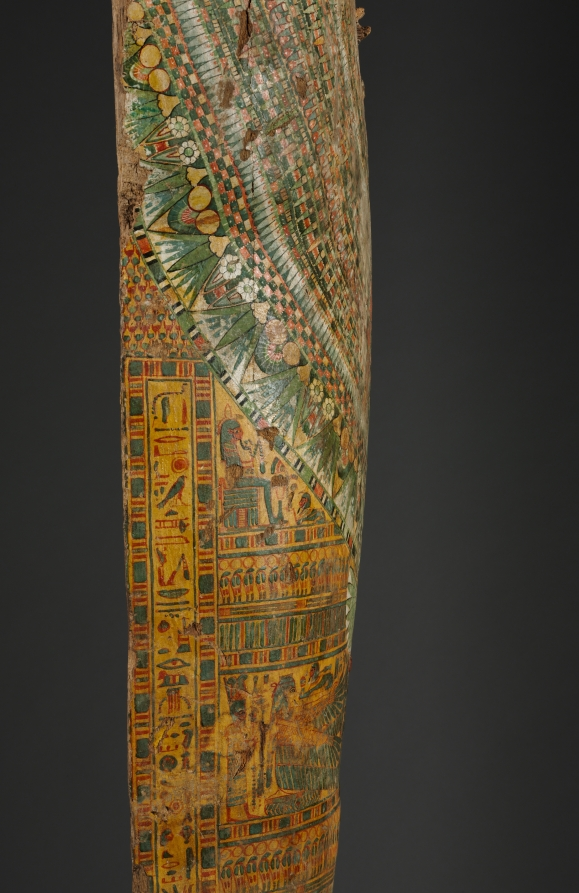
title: Coffin of Bakenmut (lid)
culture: Egypt, Thebes, Third Intermediate (1069–715 BCE), Dynasties 21–22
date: c. 1000–900 BCE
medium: gessoed and painted sycamore fig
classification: Funerary Equipment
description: The coffin of Bakenmut is one of the finest examples of painted wooden coffins made for the priests of Amen and their families at Thebes during Dynasty 21 and early Dynasty 22. The pharaohs of this time were no longer buried in the Valley of the Kings, but instead built tombs in the Delta, far to the north, where they resided. Security was lax in the Theban necropolis. The coffins and funerary goods of the wealthy citizens of Thebes were placed in unmarked and undecorated family tombs cut into the cliffs on the west bank of the Nile. All the care and detail that in more prosperous times were devoted to the decoration of the tomb chapel were now lavished on the elaborately painted coffins. Every available surface is crowded with religious scenes, images of funerary gods and goddesses, protective spells, and magical symbols. The deceased appears mummiform. An elaborate floral collar entirely covers the upper body, exposing only the separately attached hands (now lost). A pair of red "mummy braces" are crossed over the chest, their point of intersection marked by a winged sun disk. The lower body is covered with tiny figures modeled in gesso against a yellow background, which gives the effect of gold inlaid with glass or semiprecious stone. The decoration on the interior features two deified dead kings of Dynasty 18. Although these rulers had lived centuries before, memory of their greatness was still very much alive. The main scene near the top depicts Tuthmosis III, the great military pharaoh, who lived 500 years before Bakenmut. Posed as a mummy, the ruler wears a brilliant feathered garment enfolding him with falcon’s wings. The scene below features back-to-back seated images of Amenhotep I, regarded as the patron of the Theban cemetery and worshiped as a local god there.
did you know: Originally another smaller coffin was placed inside this outer coffin and in that the deceased with a mummy board would have rested.